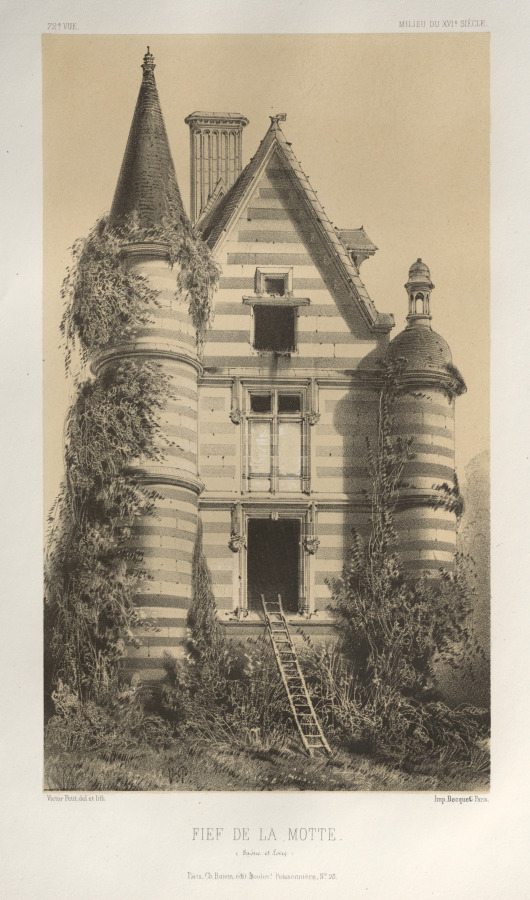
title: Architecture Pittoresque ou Monuments des XVeme. Et XVIeme. Siecles: Chateaux de France des XV et XVI Siecles: Pl. 72, Fief De La Motte (Saône et Loire)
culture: France, 19th century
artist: Victor Petit (French, 1817–1874)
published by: Charles Boivin (publisher and editor); Lith de Godard a Paris (printer)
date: 1860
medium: lithograph with tint stone, from portfolio of 100 lithographs with tint stone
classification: Print